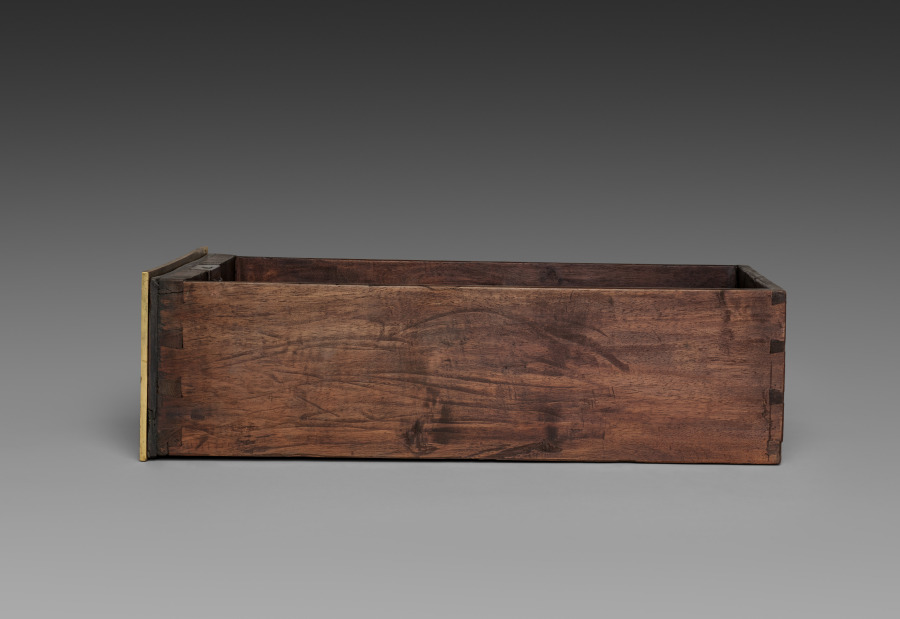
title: Side Drawer for Cabinet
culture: France, late 17th Century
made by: André-Charles Boulle (French, 1642–1732)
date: c. 1690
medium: ebony, marquetry in metal and tortoise shell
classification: Furniture and woodwork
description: Appointed cabinetmaker to King Louis XIV in 1672, André-Charles Boulle became a master of furniture making in France during the late 1600s until his death in 1732. Known primarily for his use of marquetry, in which metal patterns are inlaid into tortoiseshell then applied within the veneered surface of the furniture, Boulle established a level of quality and craftsmanship few others could achieve. As a result, his work found favor at the royal court and among other aristocrats and diplomats eager to impress the king. The inclusion of a medallion depicting Louis XIV within the bronze decoration of this chest would have identified the owner with the royal court. Often exhibiting stout architectural proportions with elegant groups of inlaid motifs such as the parrot on the central panel of this chest, Boulle’s designs are an example of the intellectual fashion for contrasting ideas, materials, and motifs.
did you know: Originally designed to sit atop an elaborate tall stand, this chest was likely altered in the late 1700s to reduce its scale and height.